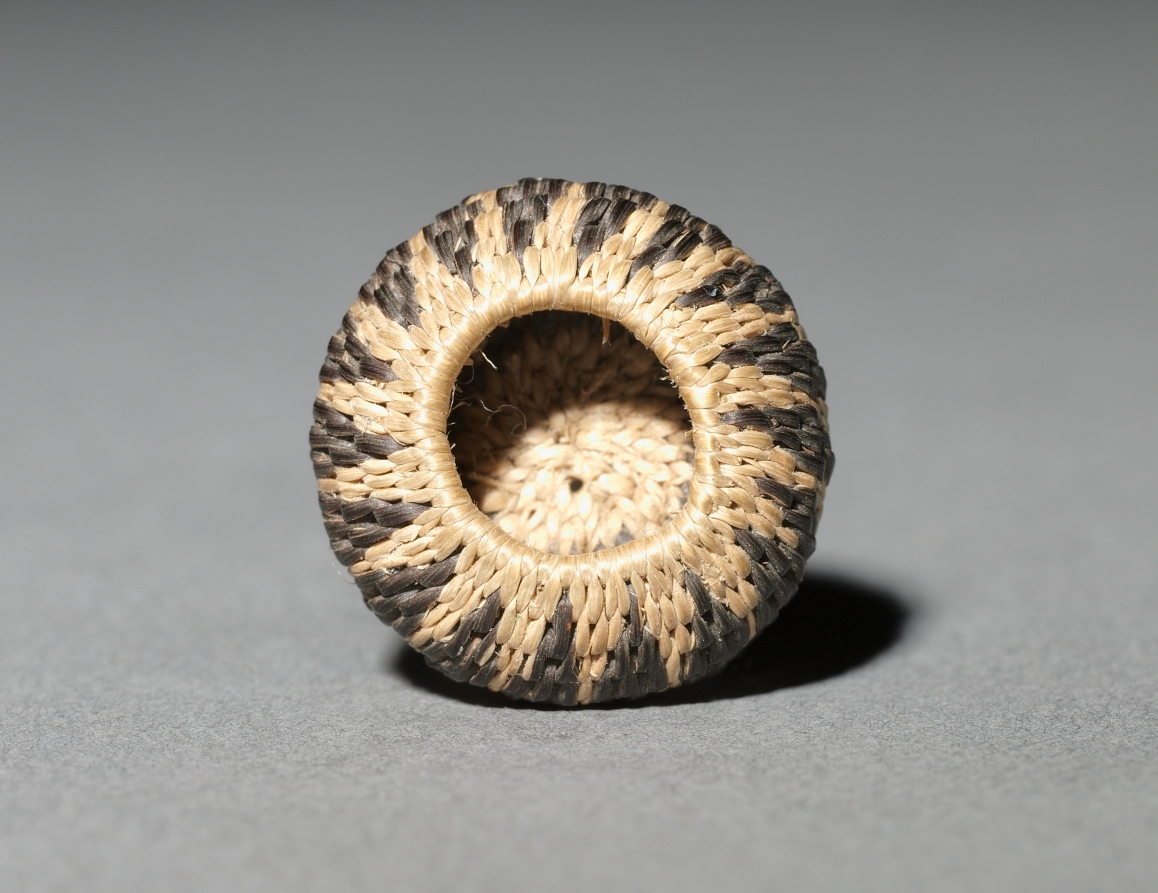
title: Miniature Round Basket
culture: California, Pomo, late 19th-early 20th century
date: late 1800s-early 1900s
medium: plant materials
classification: Basketry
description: Miniature baskets were made to demonstrate the basket-maker’s virtuoso skill, and these tiny marvels seem to be no exception—the smallest are just a few millimeters wide but still patterned. For such fine work, dexterity was required as much for preparation of materials as for weaving.